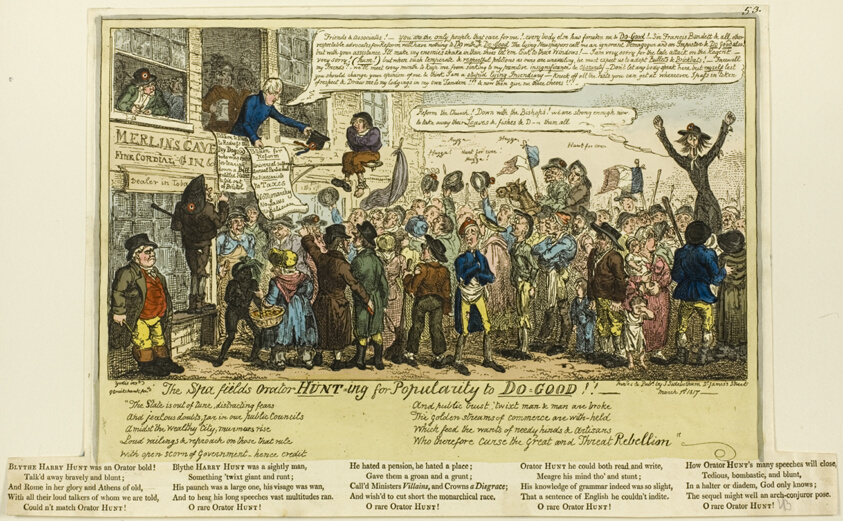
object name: Print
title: The Spafields Orator Hunt-ing for Popularity to Do-good!!!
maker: George Cruikshank (English, 1792-1878); published by J. Sidebotham (English, active 1802-1820)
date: published March, 1817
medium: Hand-colored etching on paper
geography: England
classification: etching; print; prints and drawing